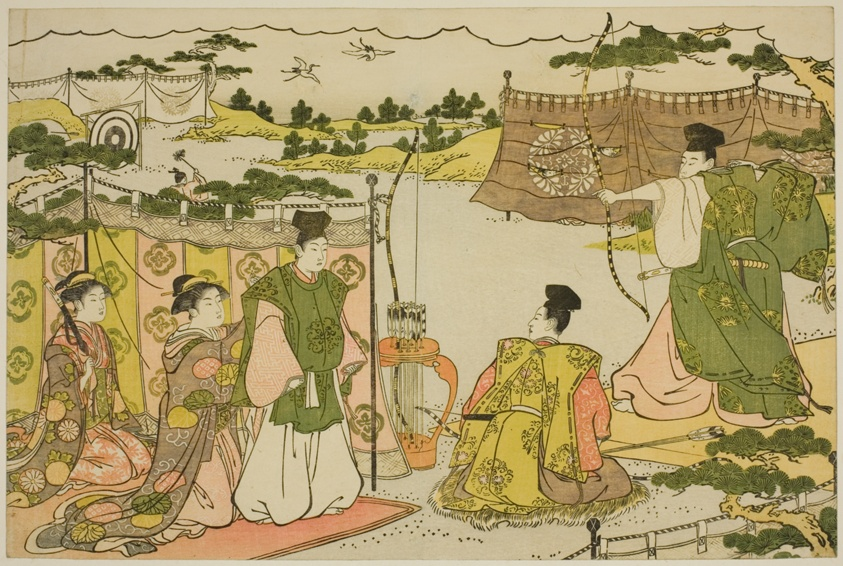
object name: Print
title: The First Archery Practice of the New Year (Yumi hajime), from the illustrated book "Colors of the Triple Dawn (Saishiki mitsu no asa)"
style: Japanese (culture or style)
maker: Torii Kiyonaga (Japanese, 1752-1815)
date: c. 1787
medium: Color woodblock print; oban, page from an illustrated book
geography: Japan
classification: woodblock print; print; asian art